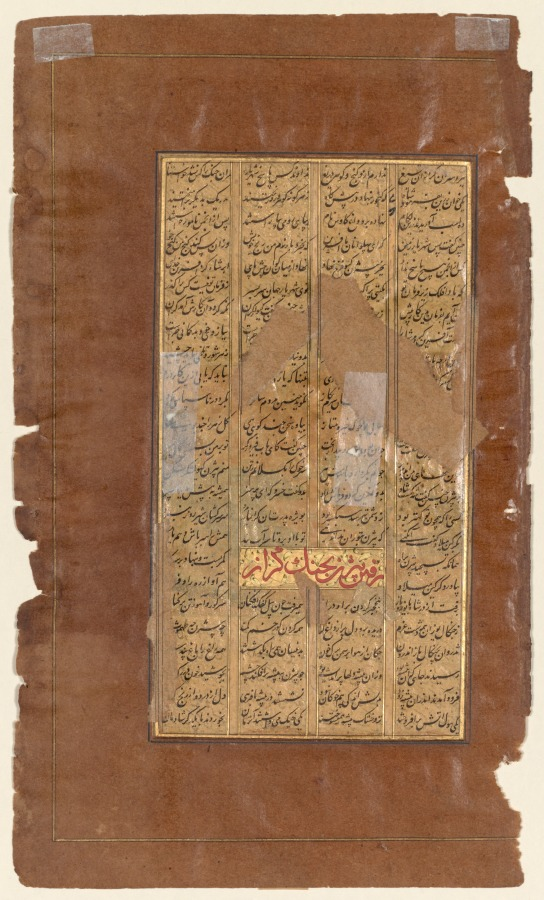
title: Bijan killing the wild boars of Irman, from a Shah-nama (Book of Kings) of Firdausi (Persian, about 934–1020), (recto)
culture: India, Bijapur, Deccan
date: c. 1610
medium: Gum tempera, ink, and gold on paper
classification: Painting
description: This illustrated page from a Shah-nama depicts the first adventure of the hero Bijan, son of an Iranian knight. When reports arrived at the king’s court of wild boars ravaging the borderlands between the enemy realms of Iran and Turan, Bijan volunteered to hunt and kill the beasts, much to the chagrin of his father, who doubted his young son’s ability to navigate the politically volatile situation. The fearless Bijan is shown on horseback as he singlehandedly strikes down on the bodies of the wild boars in the brush. After overzealously celebrating his success, Bijan must be rescued from a pit by Rustam. This early manuscript from the Deccan made for the sultan of Bijapur is characterized by glowing colors and lavish use of gold.